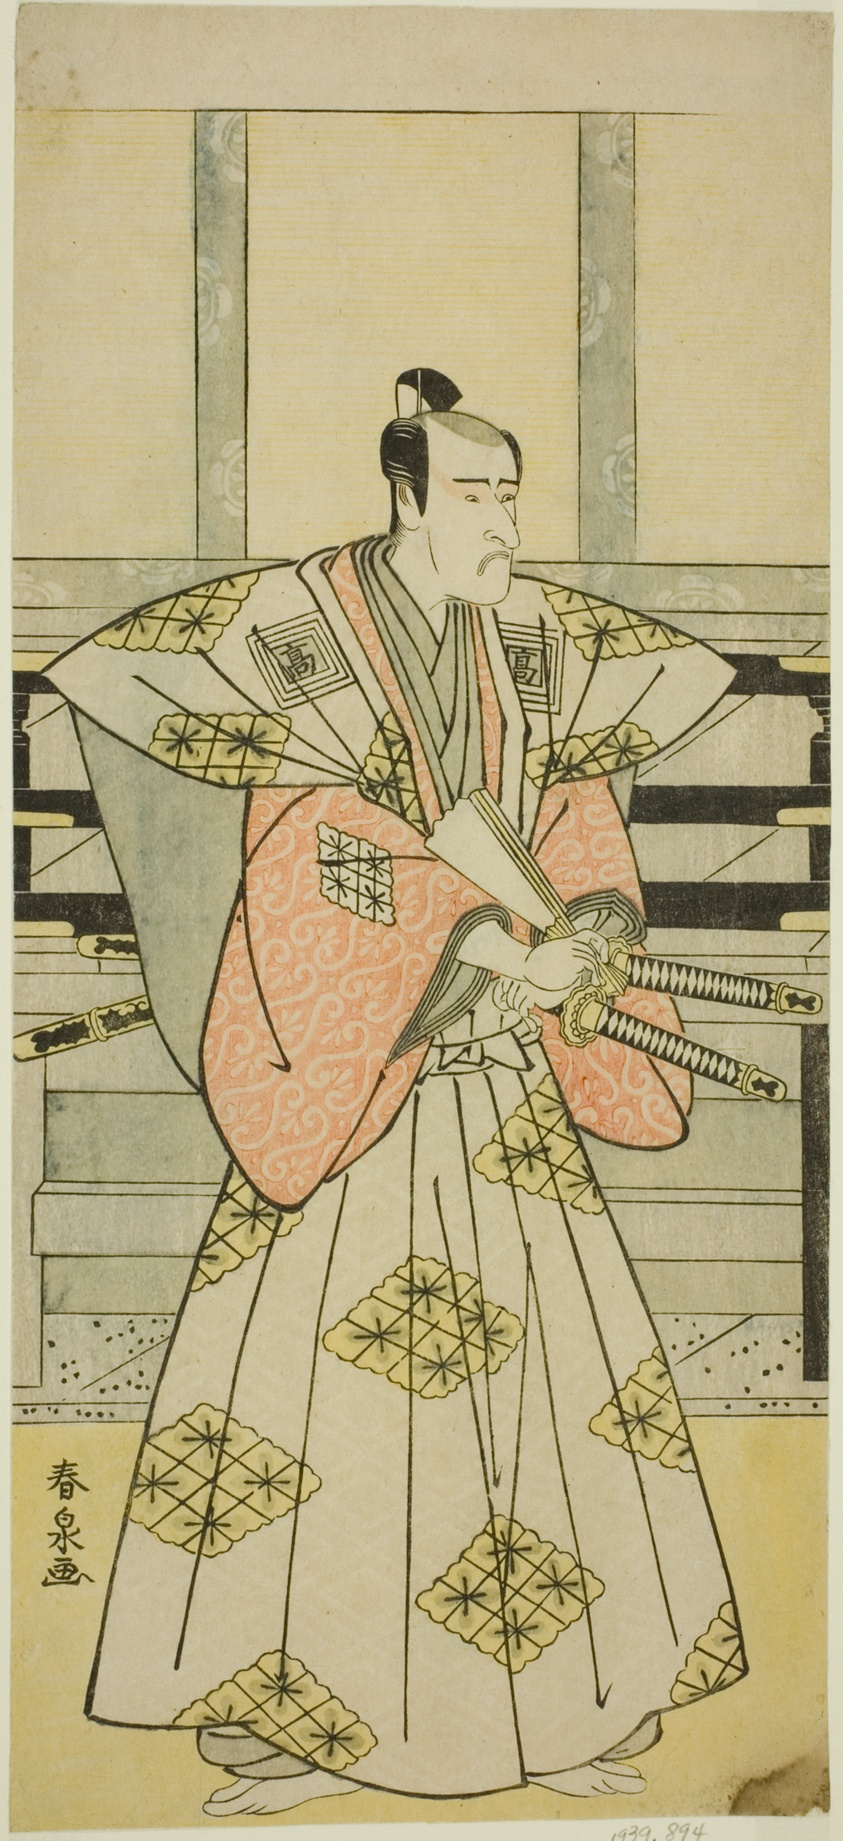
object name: Print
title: The Actor Ichikawa Komazo III as Fuji Sakon (?) in the Play Egara Tenjin Risho Kagami (?), Performed at the Nakamura Theater (?) in the Third Month, 1789 (?)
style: Japanese (culture or style)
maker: Katsukawa Shunsen (Japanese, active 1780s-early 1790s)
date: c. 1789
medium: Color woodblock print; hosoban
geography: Japan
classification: woodblock print; print; asian art